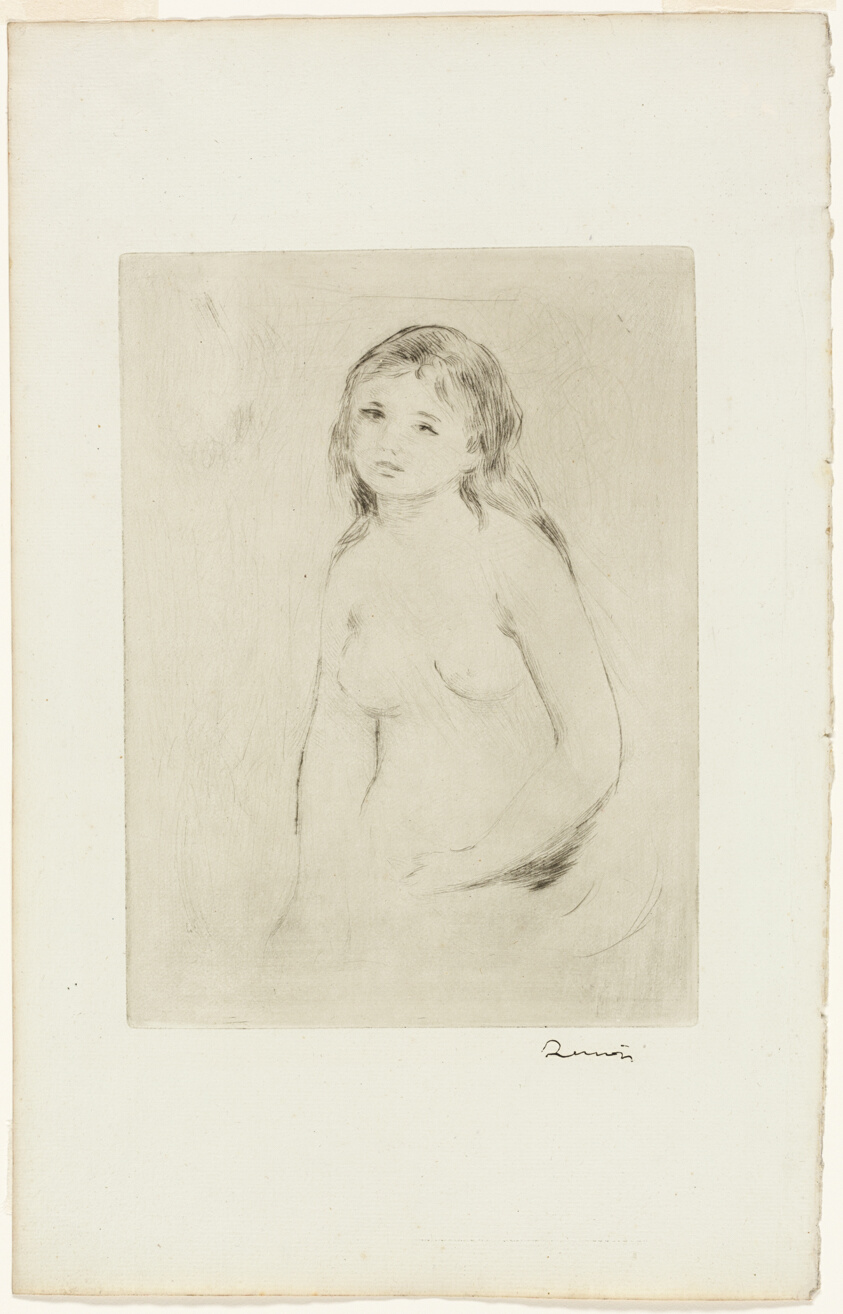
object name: Print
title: Study for a Female Bather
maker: Pierre Auguste Renoir; French, 1841-1919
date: c. 1906, printed posthumously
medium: Drypoint in dark brown ink on ivory laid paper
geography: France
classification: drypoint; print; prints and drawing